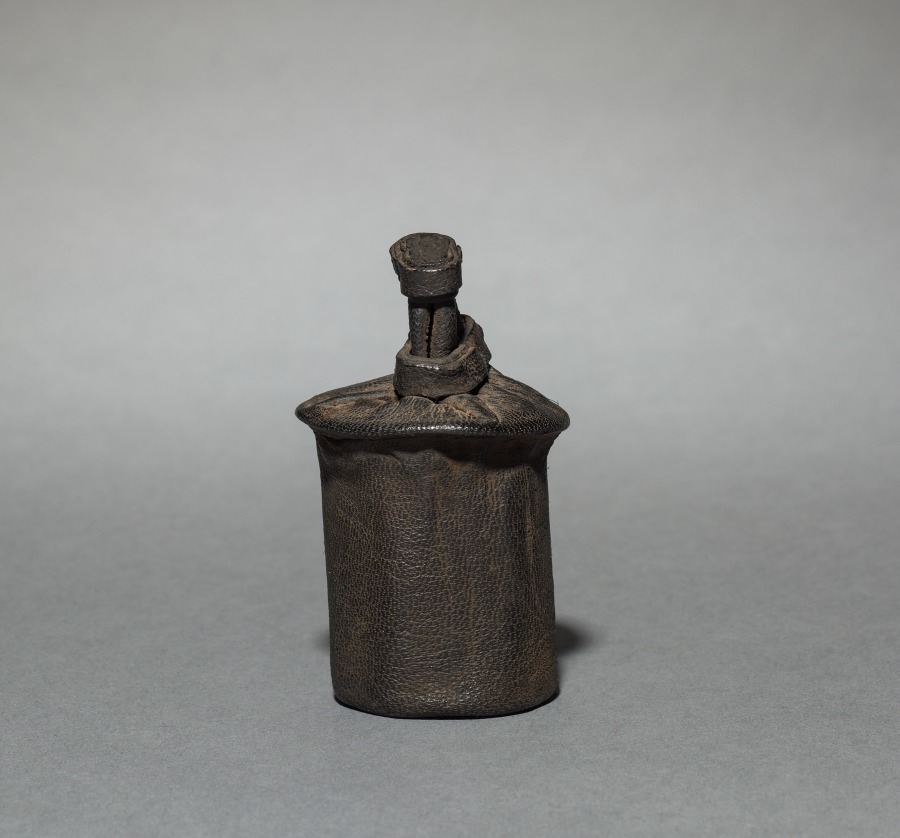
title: Stopper for Ten Nesting Wedding Baskets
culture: Africa, Western Sudan, Burkina Faso, Lobi, 20th century (?)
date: c 1900s ?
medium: Plant fiber and leather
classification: Vessels